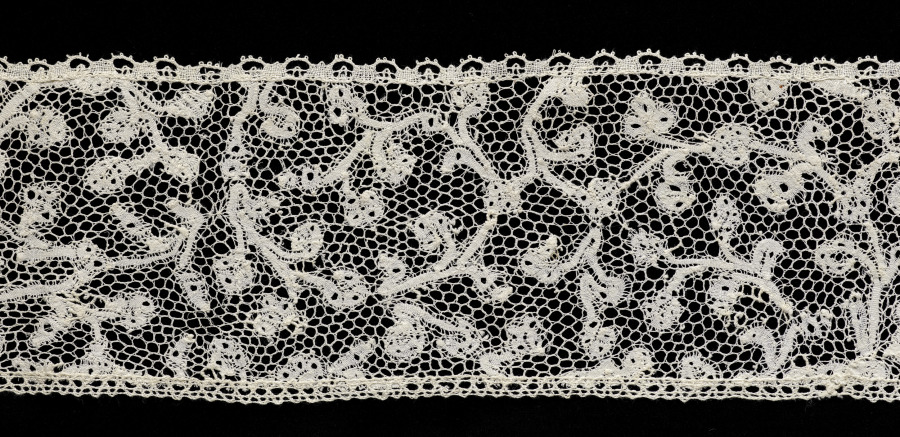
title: Lace Edging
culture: Italy, Milan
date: 1700s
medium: Linen: bobbin lace design on mesh ground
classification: Lace